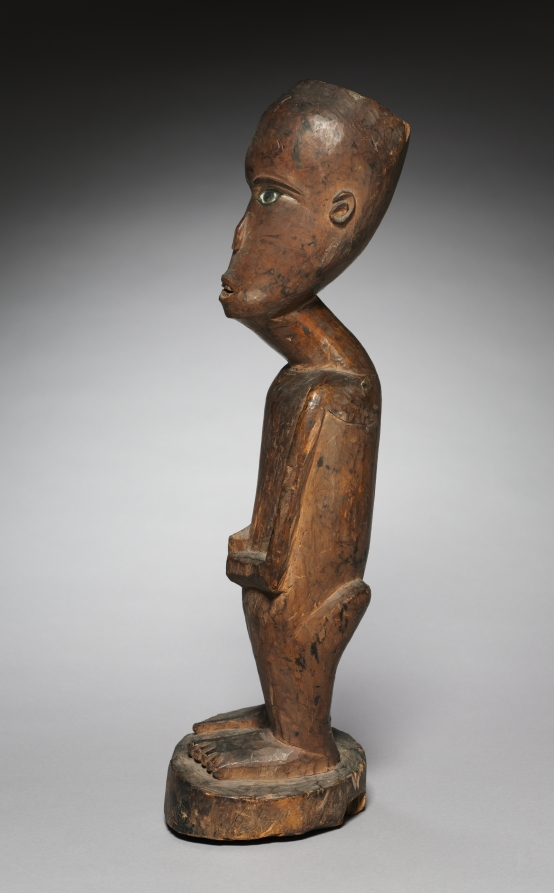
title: Male Figure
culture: Central Africa, Democratic Republic of the Congo, Kongo or Vili, early 19th century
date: early 1800s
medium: Wood, iron, and metalized glass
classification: Sculpture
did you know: This work has a paper label indicating it was exhibited in the 1857 Art Treasures of Great Britain in Manchester, England.